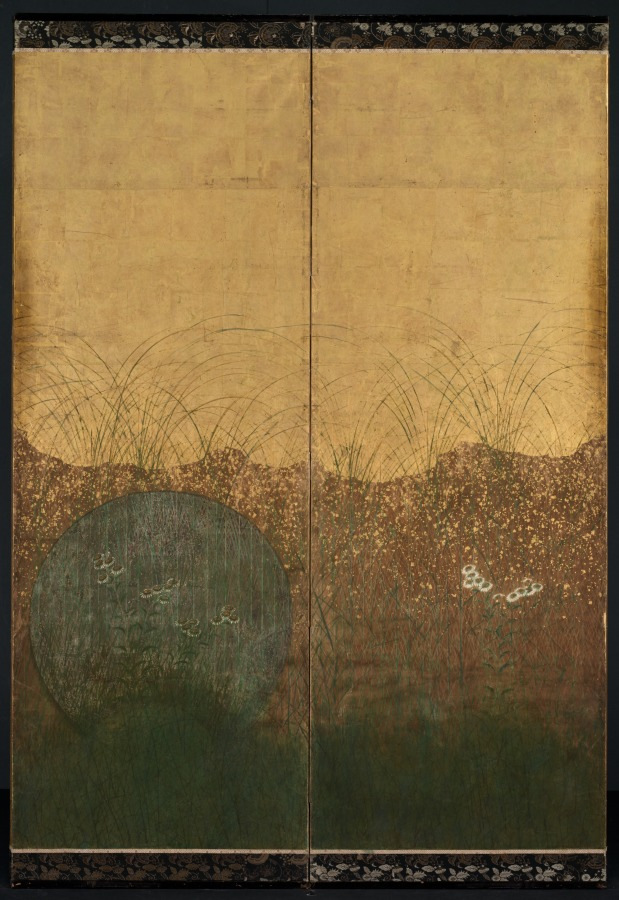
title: Autumn Evening with Full Moon on Musashino Plain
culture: Japan, Edo period (1615–1868)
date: early 1600s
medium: One of a pair of six-fold screens; ink, color, and gold and silver foil on gilded paper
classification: Painting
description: Tall grasses and autumn flowers reach out of thick green undergrowth in this depiction of the plain of Musashi, a site famous from classical Japanese poetry. A silver disc, now tarnished, represents the full moon. Flecks of cut-gold foil in the sky evoke the day’s passage into night. Once a wilderness with a vast horizon, Musashi is now densely populated.